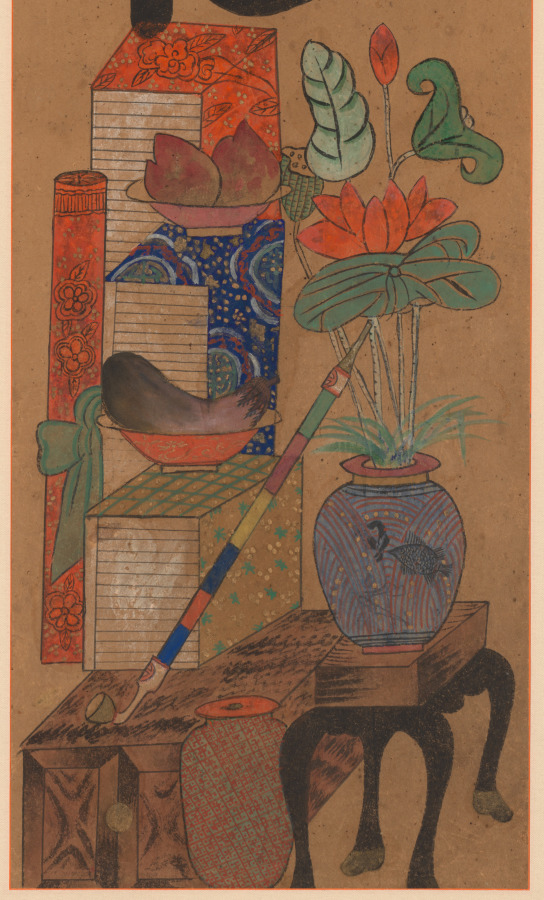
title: Munja-Chaekgeori Screen (Character-Books Screen)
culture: Korea, Joseon dynasty (1392–1910)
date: early 1900s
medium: Eight-panel folding screen, ink on paper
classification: Painting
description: This folding screen is a whimsical harmony of two different subjects: chaekgeori, or books and things; and munja, or characters. The lower section of each panel depicts the imagery of things, including books, decorative arts, and utilitarian objects. The upper portion of each panel bears a classical Chinese character. Read from far right to left, the eight characters refer to the values of Confucian teachings of the Joseon dynasty: filial piety, brotherly love, loyalty, trust, propriety, righteousness, modesty, and humility. While these two pictorial genres are harmoniously conjoined on the same picture plane, two sharply contrasting world views—urban consumerism and traditional Confucian ethics that despise materialism—compete with one another.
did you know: The eight Korean characters each mean filial piety, brotherly love, loyalty, trust, propriety, righteousness or justice, modesty or integrity, and humility or the feeling of shame.